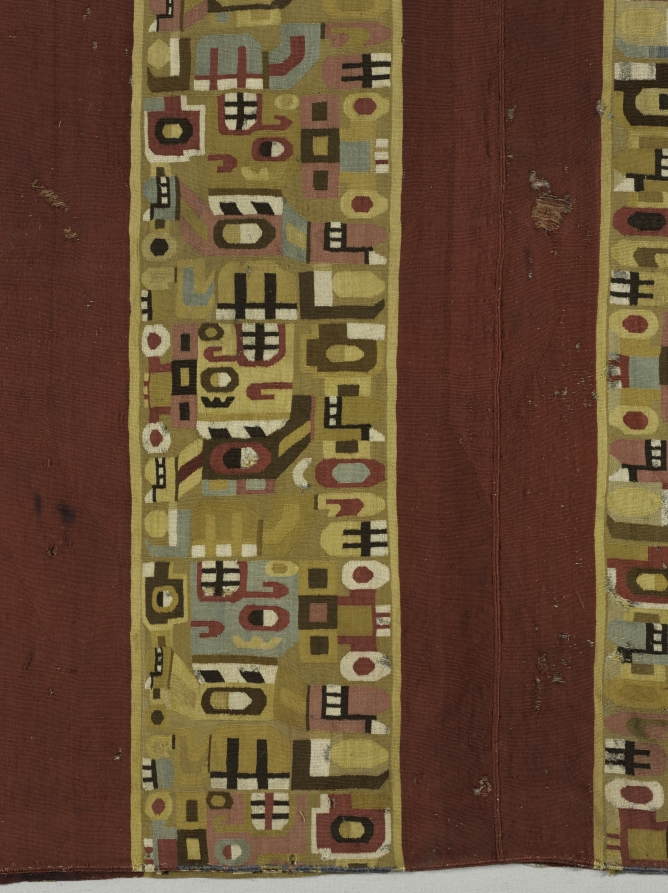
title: Tunic with Sacrificer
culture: South America, Peru, Central Andes, Middle Horizon, Wari people, 7th-11th century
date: 600–1000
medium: camelid-fiber, cotton; tapestry weave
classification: Textile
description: An extremely abstract supernatural sacrifice repeats in different colors and orientations across the body of this tunic, which was shortened on one side in antiquity. Look for the toothy black-and-white mouth in the sacrificer's upward-gazing head; other facial features include a button nose and a vertically divided eye. The figure holds the L-shaped haft of an axe behind its back and, at the front of its body, a short staff with a severed, upside-down human head on the top.